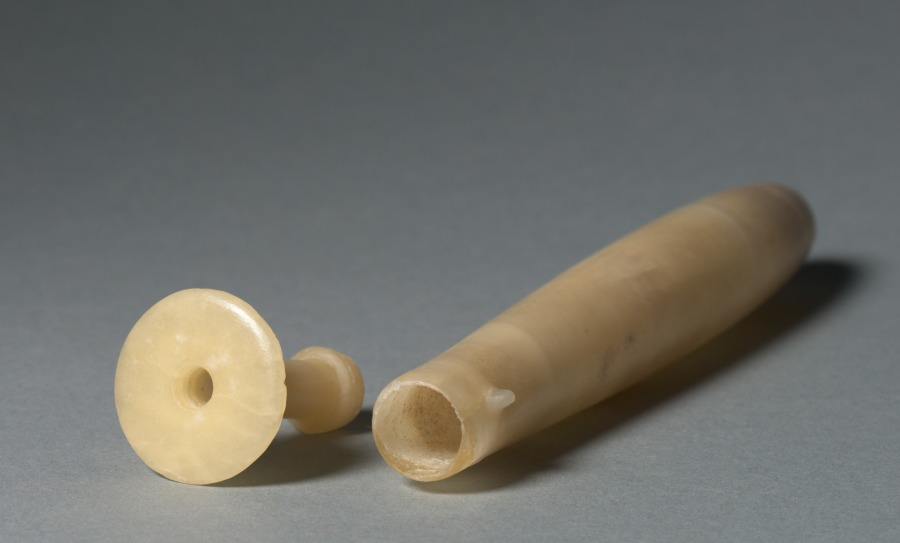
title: Alabastron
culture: Egypt, Greco-Roman period (332 BCE–395 CE), Ptolemaic dynasty (305–30 BCE)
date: 305–222 BCE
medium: travertine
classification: Vessels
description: Both ancient Egyptian men and women loved cosmetics. Unguents, oils, and perfumes made from aromatic plant resins and gums were obtained at great cost from distant lands. The objects identified with cosmetics were given lavish treatment.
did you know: This perfume holder might have been attached to a string, making it easily portable.